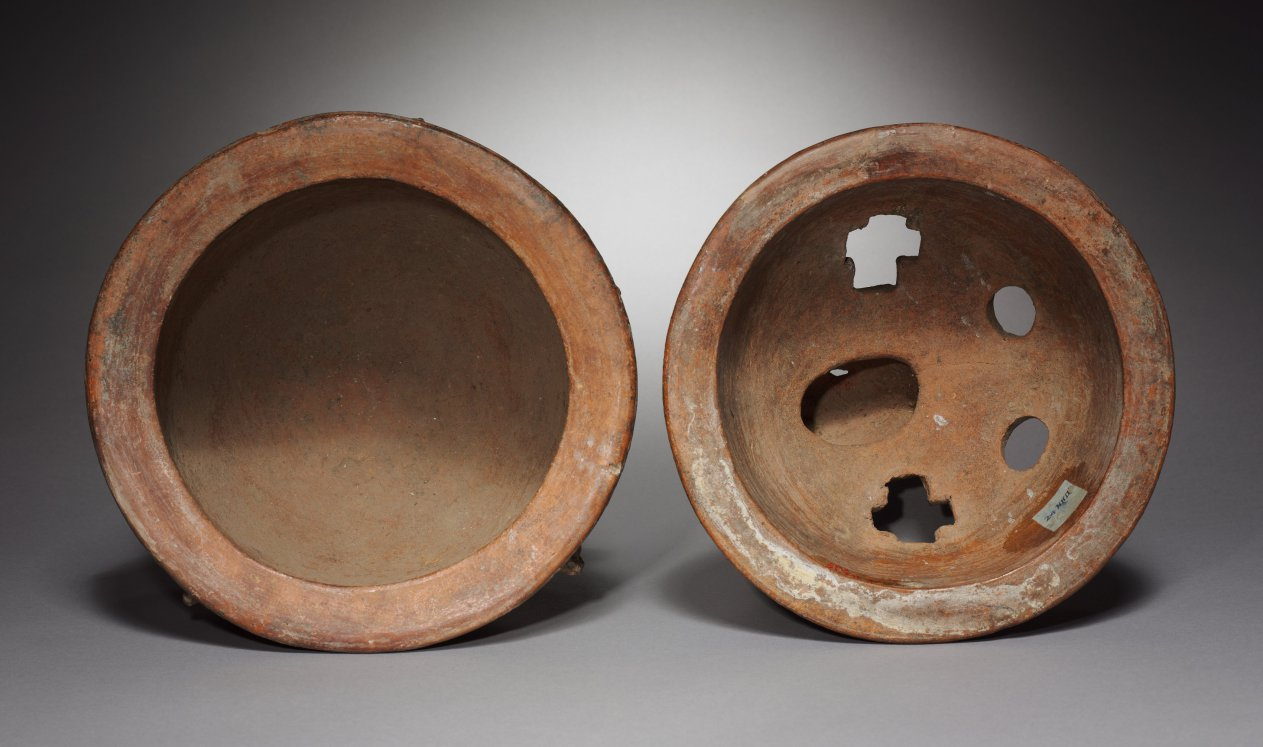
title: Incense Burner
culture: Guatemala, Quiché, San Juan Cotzal, Maya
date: 600–1000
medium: pottery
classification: Ceramic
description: According to the Popol Vuh, a sixteenth-century Quiché Maya manuscript, the world has been created and destroyed twice, and we now live in the third creation. In the second creation, human beings were made from wood and reeds. They lacked souls and minds, and they did not revere their creator. Because of these imperfections, most were killed by an uprising of utensils and domestic animals. Monkeys are the descendents of the survivors.